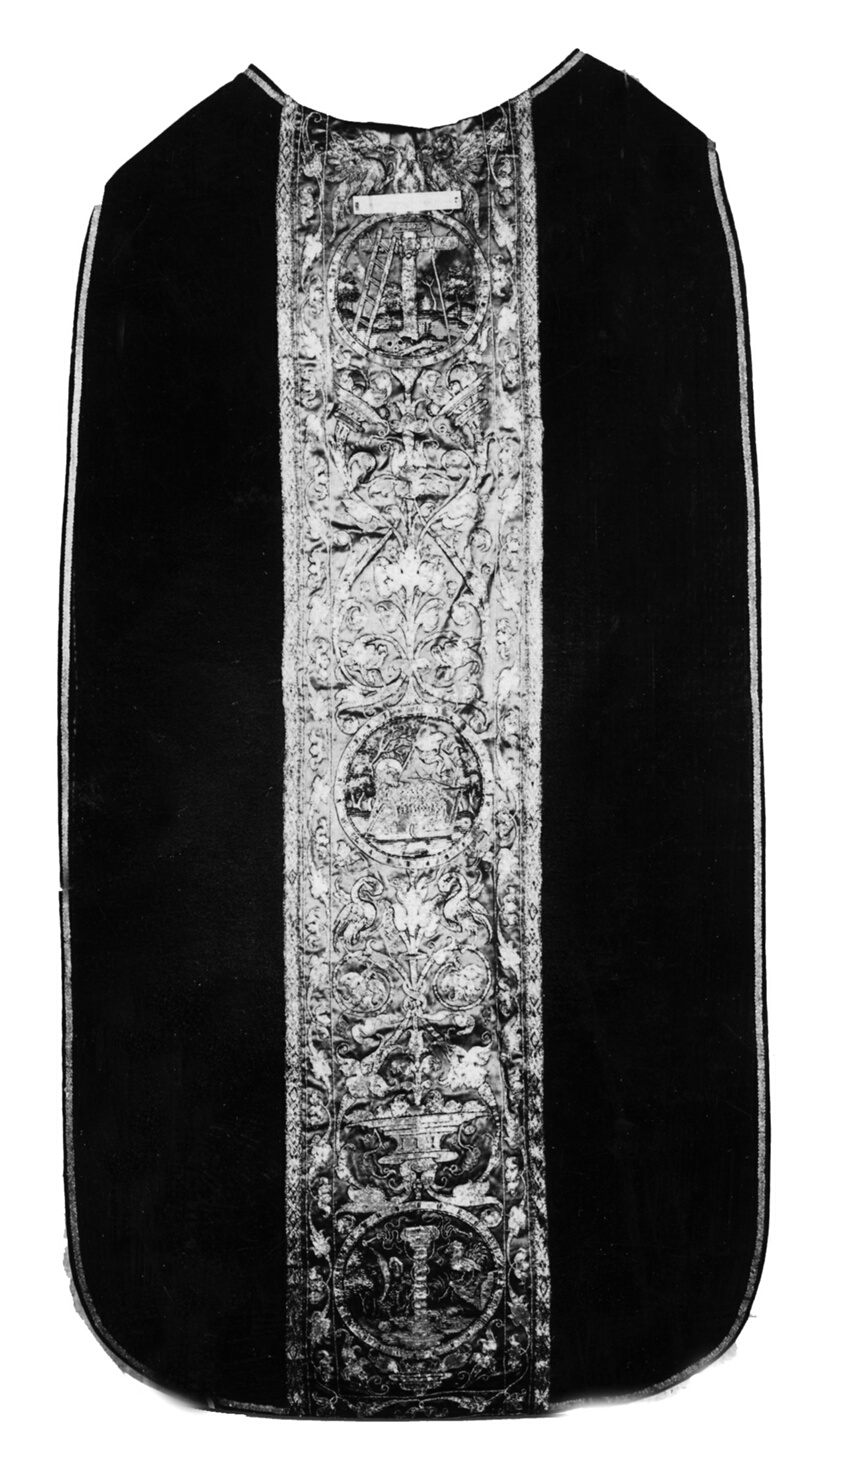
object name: Textile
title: Chasuble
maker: Italy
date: 16th century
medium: Silk, warp-float faced 3:1 'S' twill weave with supplementary pile warps forming cut solid velvet; Orphrey: silk, warp-float faced 7:1 satin weave; embroidered with silk and gilt-metal-strip-wrapped silk in satin, split, stem and straight stitches; couching; edged with gilt-metal-strip-wrapped linen diamond twill and gilt-metal-strip-wrapped silk plain weave tapes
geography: Italy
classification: textile; needlework (visual works); costume; liturgical